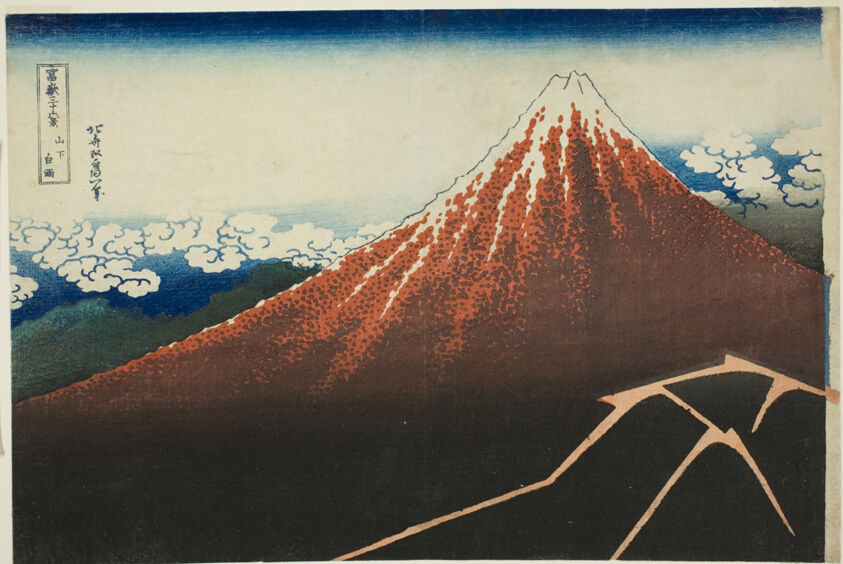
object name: Print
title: Shower Below the Summit (Sanka hakuu), from the series "Thirty-Six Views of Mount Fuji (Fugaku sanjurokkei)"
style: Japanese (culture or style)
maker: Katsushika Hokusai 葛飾 北斎; Japanese, 1760-1849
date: c. 1830/33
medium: Color woodblock print; oban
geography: Japan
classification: woodblock print; print; asian art